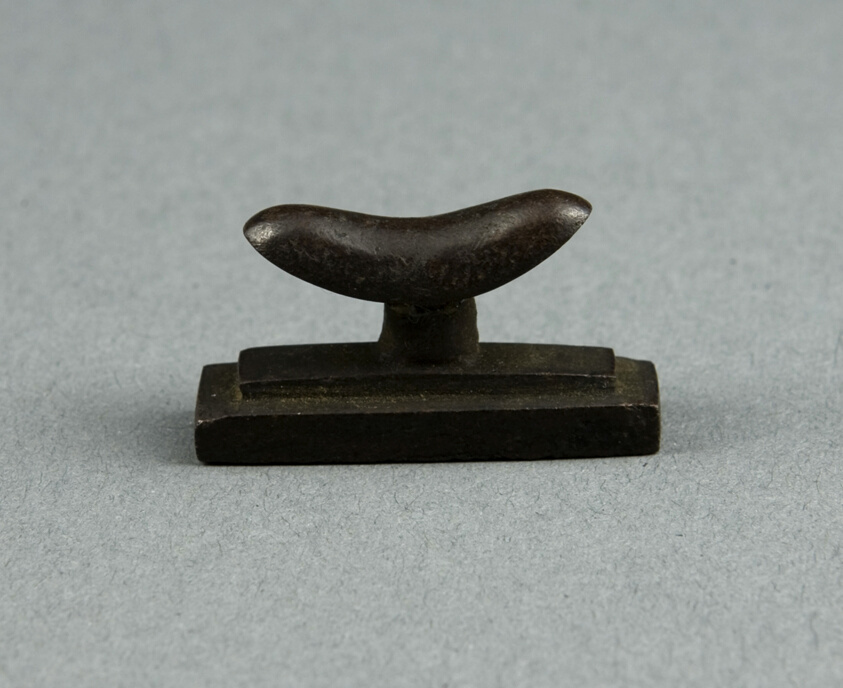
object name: Costume and Accessories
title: Amulet of a Headrest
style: third intermediate period, egyptian, ancient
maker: Egyptian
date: Third Intermediate Period, Dynasty 21–25 (1070–656 BCE)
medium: Hematite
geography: Egypt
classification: amulet; jewelry; stone; ancient art; costume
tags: Headrest